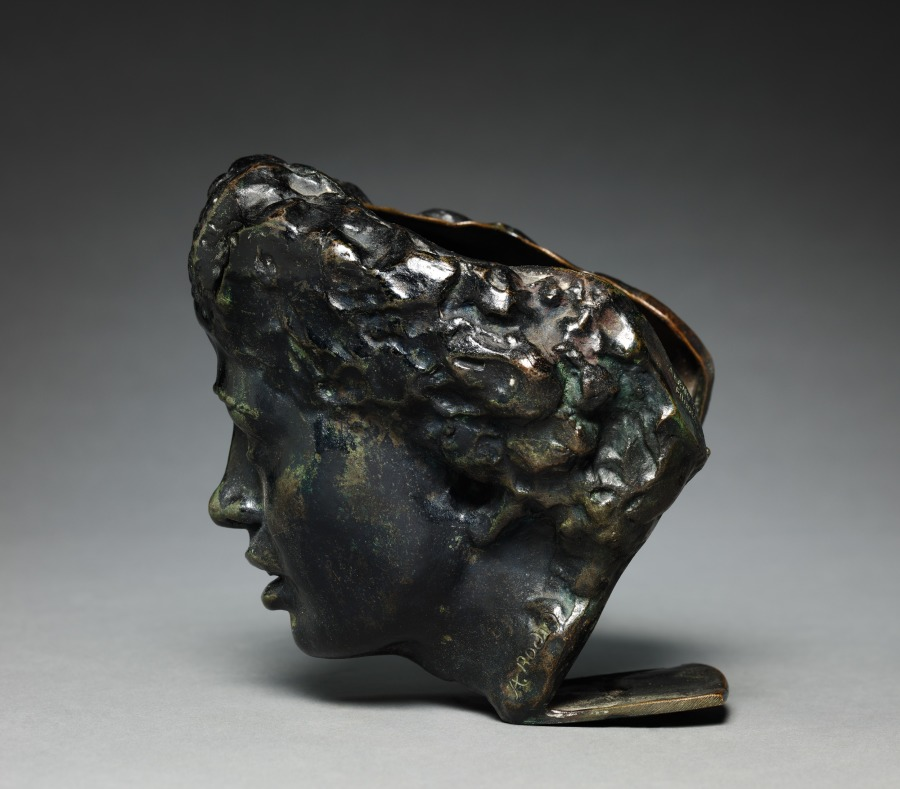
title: Mask of Séverine (Caroline Rémy)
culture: France, 19th century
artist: Auguste Rodin (French, 1840–1917)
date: 1893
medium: bronze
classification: Sculpture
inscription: Signed sinister side of neck: "A. Rodin"; inside dexter side in relief: "A. Rodin"